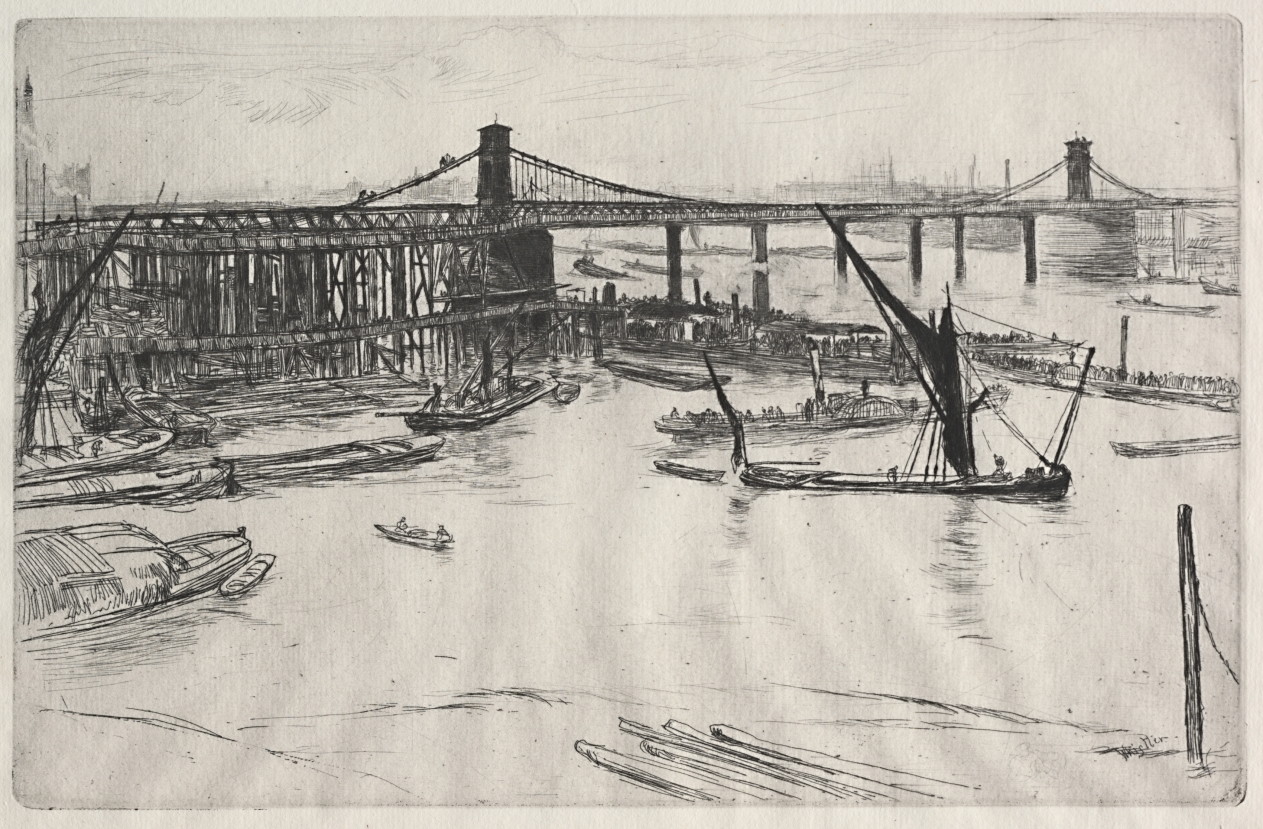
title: Old Hungerford Bridge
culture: America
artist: James McNeill Whistler (American, 1834–1903)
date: 1861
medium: etching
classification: Print